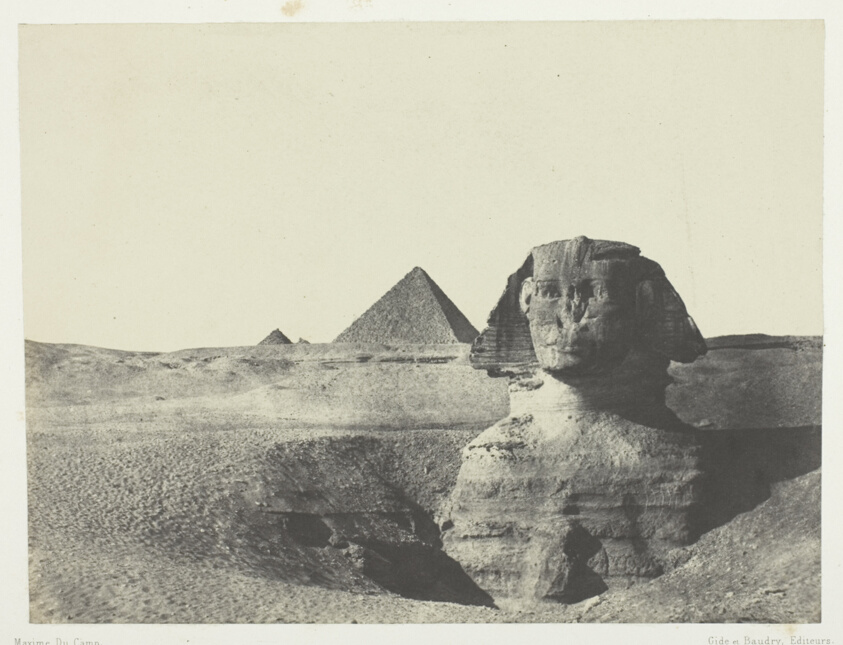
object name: Photograph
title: Le Sphynx vu de Face, Egypte Moyenne, plate 11 from the album "Egypte, Nubie, Palestine et Syrie" (1852)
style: 19th century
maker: Maxime Du Camp (French, 1822–1894)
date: 1849/51, printed 1852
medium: Salted paper print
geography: France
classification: salted paper print; photographic process; photography; photograph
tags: Collected by Hugh Edwards, Egypte, Nubie, Palestine et Syrie